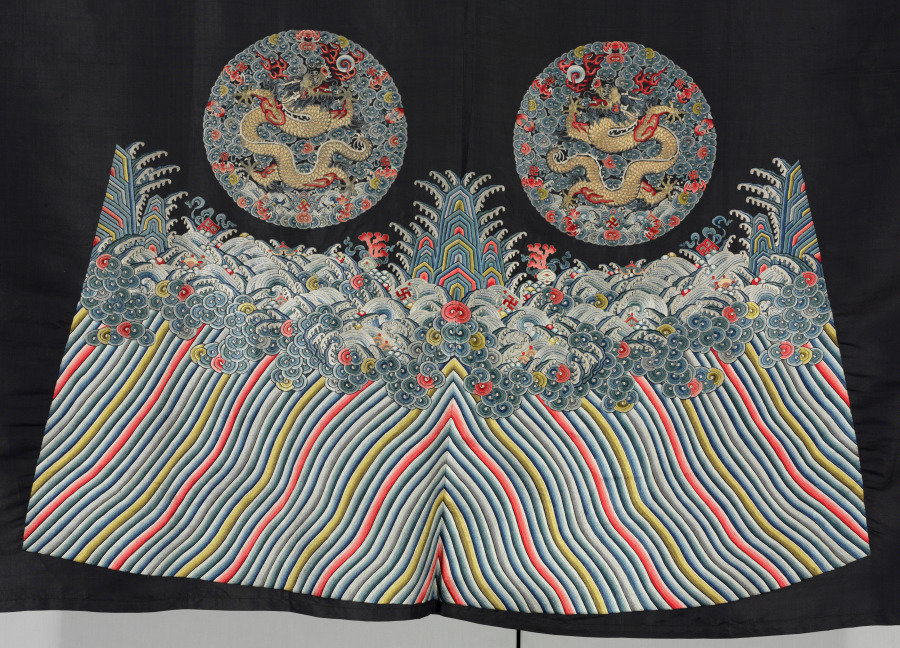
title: Unfinished robe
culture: China, Qing dynasty (1644-1911)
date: 1800–1825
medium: Silk with silk and metal thread embroidery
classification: Garment